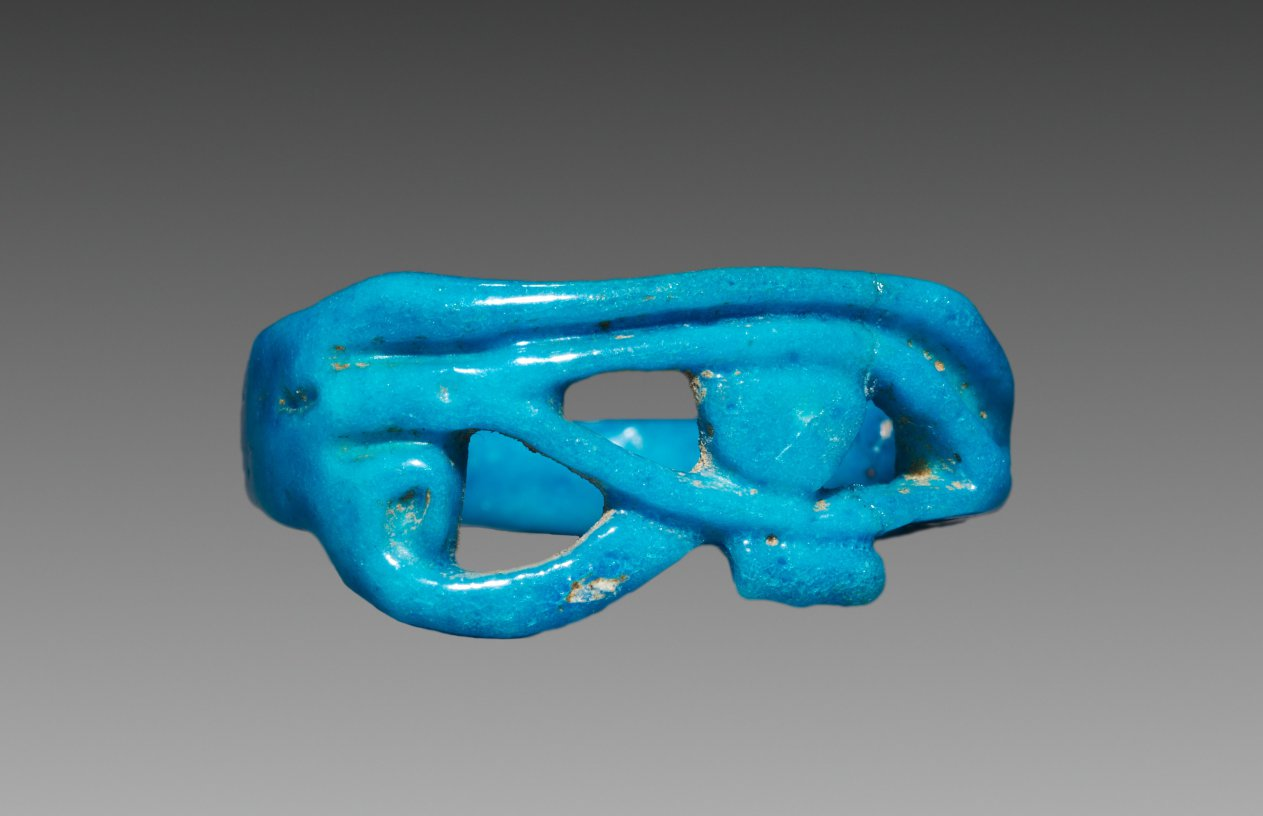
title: Wedjat-Eye Ring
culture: Egypt, New Kingdom (1540–1069 BCE), Dynasty 18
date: 1350–1296 BCE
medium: bright turquoise blue faience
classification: Jewelry